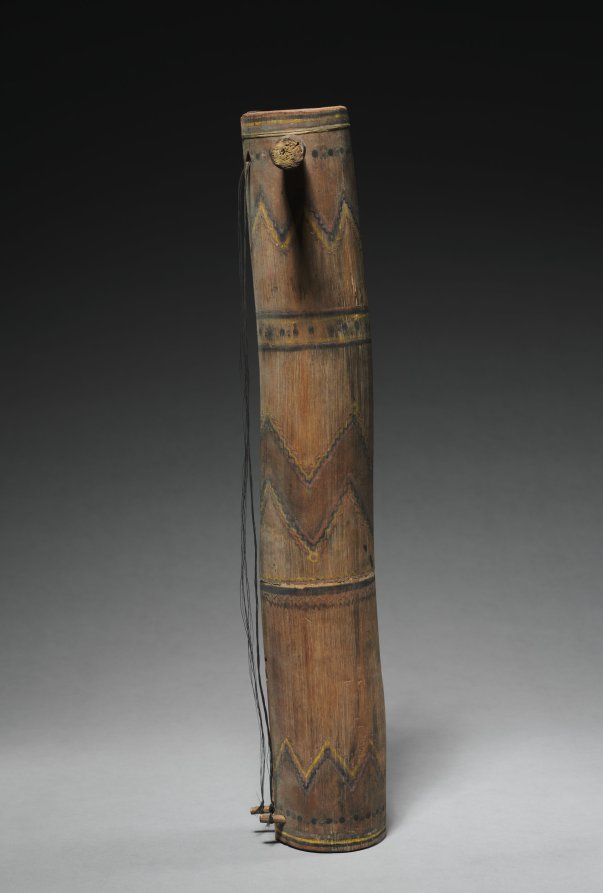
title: Fiddle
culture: America, North American Indian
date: 20th century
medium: wood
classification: Musical Instrument